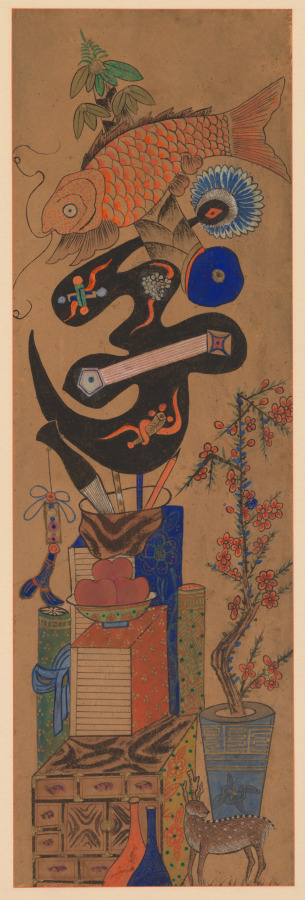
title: Munja-Chaekgeori Screen (Character-Books Screen)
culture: Korea, Joseon dynasty (1392–1910)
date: early 1900s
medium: Eight-panel folding screen, ink on paper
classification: Painting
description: This folding screen is a whimsical harmony of two different subjects: chaekgeori, or books and things; and munja, or characters. The lower section of each panel depicts the imagery of things, including books, decorative arts, and utilitarian objects. The upper portion of each panel bears a classical Chinese character. Read from far right to left, the eight characters refer to the values of Confucian teachings of the Joseon dynasty: filial piety, brotherly love, loyalty, trust, propriety, righteousness, modesty, and humility. While these two pictorial genres are harmoniously conjoined on the same picture plane, two sharply contrasting world views—urban consumerism and traditional Confucian ethics that despise materialism—compete with one another.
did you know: The eight Korean characters each mean filial piety, brotherly love, loyalty, trust, propriety, righteousness or justice, modesty or integrity, and humility or the feeling of shame.